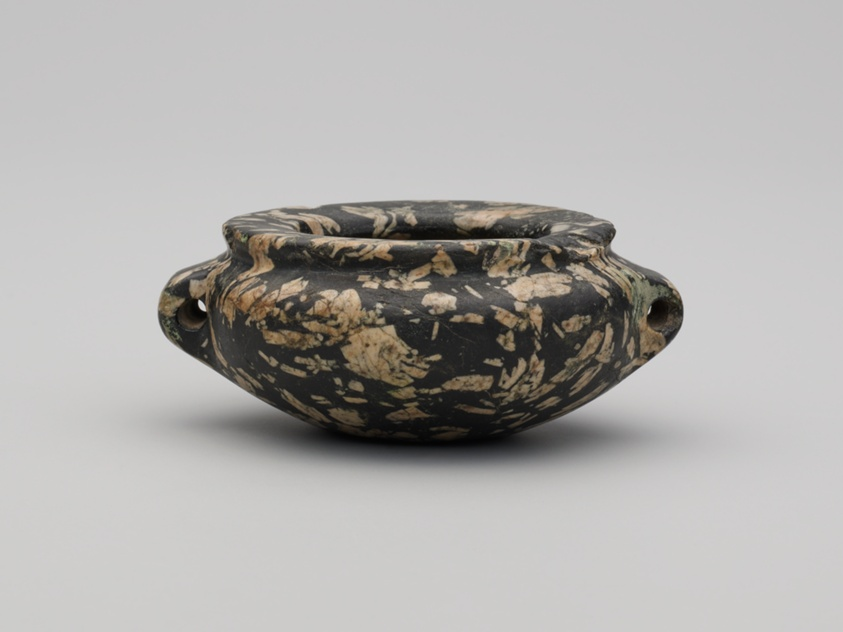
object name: Vessel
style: ancient, egyptian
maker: Egyptian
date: Predynastic Period, Late Naqada II (about 3300–3200 BCE)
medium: Andesite porphyry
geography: Egypt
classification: vessel; stone; ancient art